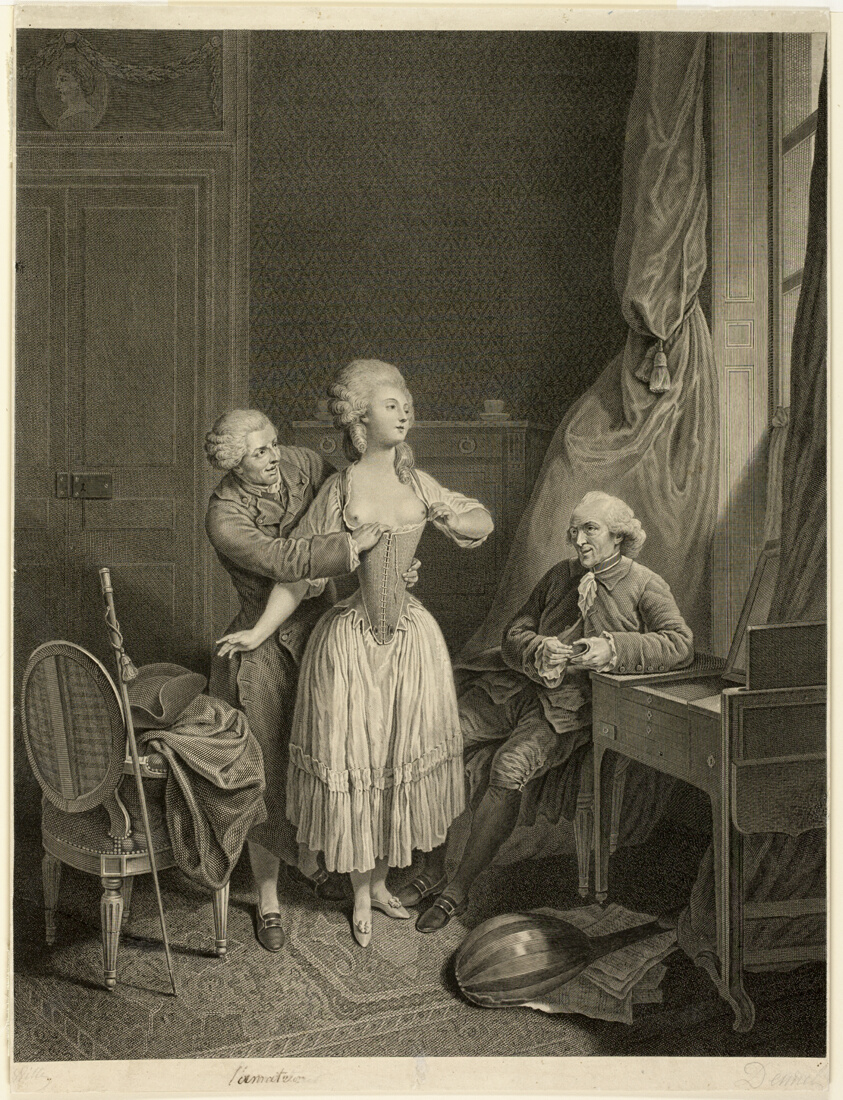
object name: Print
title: The Test of the Corset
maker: After Antoine Francois Dennel; French, 1741-1806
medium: Engraving on paper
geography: France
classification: engraving; print; prints and drawing